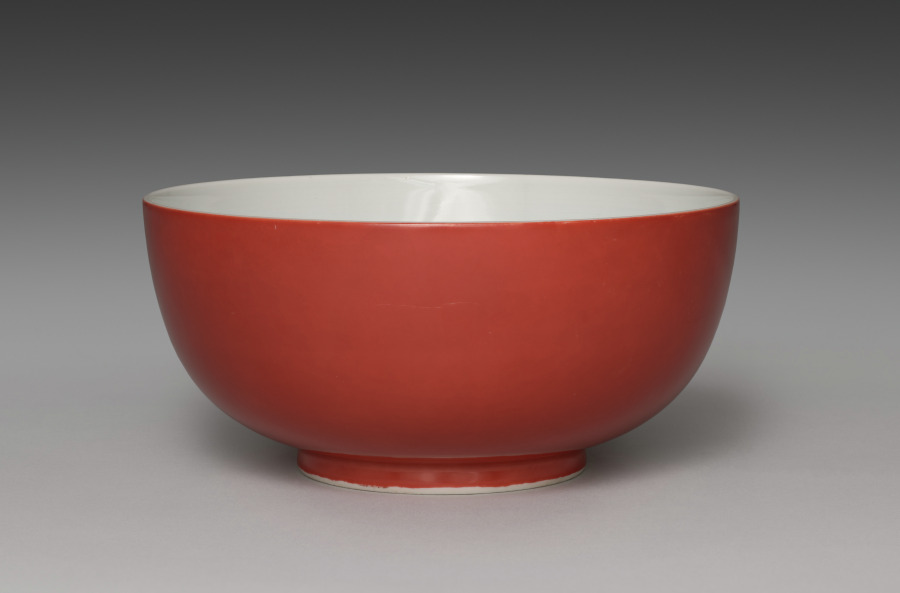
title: Sweets Bowl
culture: Japan, Taishō period (1912–26) or Shōwa period (1926–89)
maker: Seifū Yohei IV (Japanese, 1872–1951)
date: 1914–46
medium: Porcelain with coral red glaze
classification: Ceramic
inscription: 清風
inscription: 成山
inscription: 清風造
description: Like his father, Yohei IV also produced works with red monochrome glazes, like this red coral–glazed sweets bowl with white interior.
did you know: Seifū Yohei IV was active at home and abroad and won international recognition for his ceramic's glazes and designs.